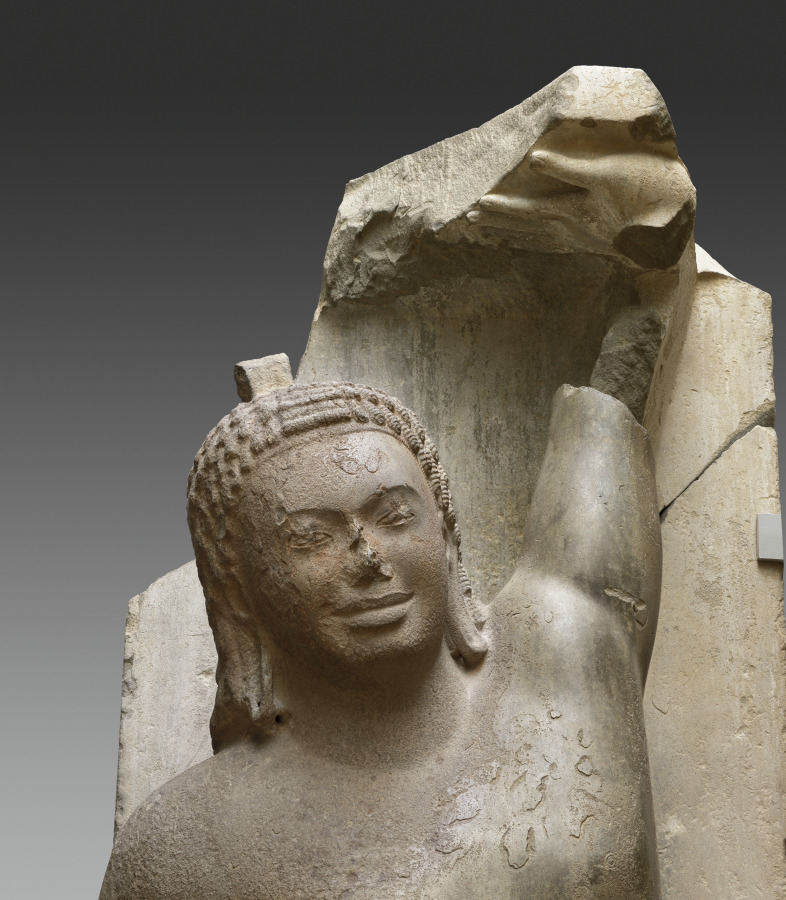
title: Krishna Lifting Mount Govardhan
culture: Southern Cambodia, Takeo Province, Phnom Da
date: c. 600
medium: Sandstone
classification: Sculpture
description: This masterwork of early Cambodian sculpture shows the Hindu god Krishna effortlessly holding aloft a mountain to protect his fellow villagers and herds from torrential storms sent by a jealous old god. It is one of eight monumental monolithic figures recovered from a two-peaked mountain in the floodplains of the Mekong River delta, on the outskirts of the ancient urban center of Angkor Borei.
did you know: Gold earrings were once fastened to the sculpture using holes in the figure's earlobes.